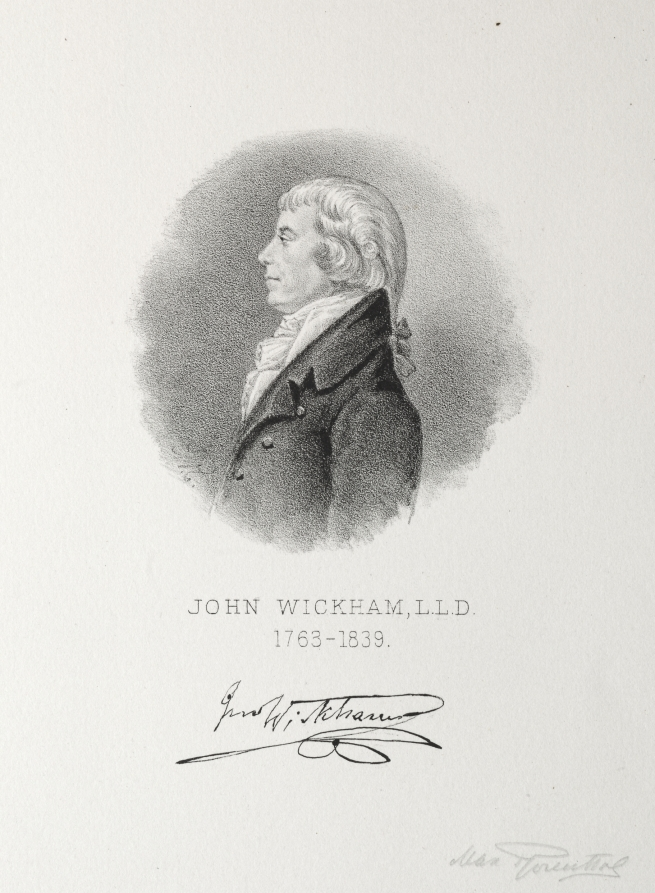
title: John Wickham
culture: America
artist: Max Rosenthal (American, 1833–1918)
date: c. 1900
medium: lithograph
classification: Print